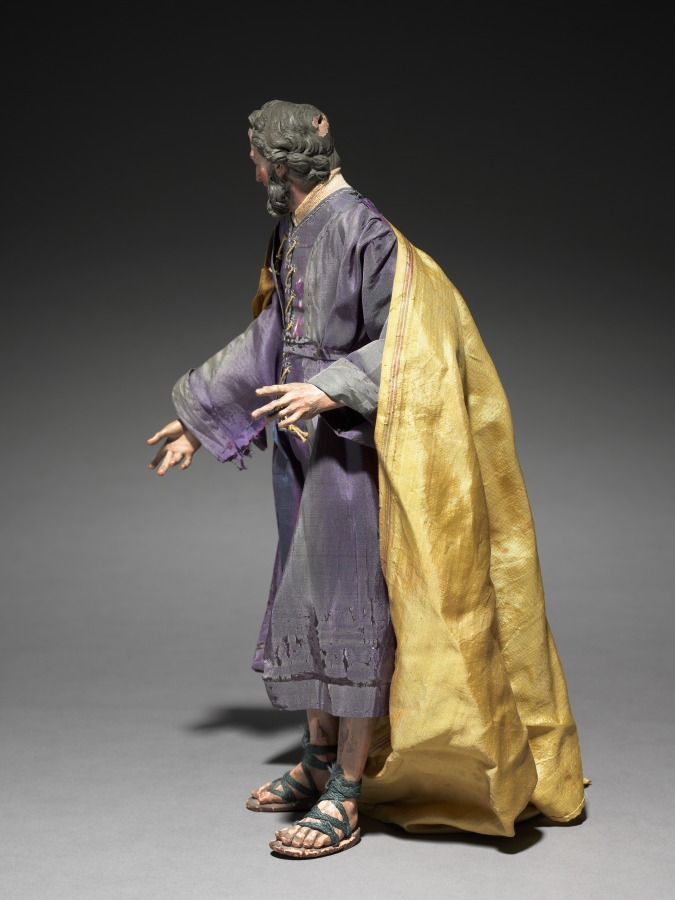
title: Figure from a Crèche: Joseph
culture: Italy, Naples, late 18th-early 19th century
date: 1780–1830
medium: painted wood and terracotta with various textiles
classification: Sculpture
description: The practice of creating scenes of the Nativity for the home dates from the early 1700s in Italy, where people began to set up doll-like figures of about a foot or less in height. The custom was particularly popular in Naples around 1800, where crèche scenes (crèche means cradle, or crib) included many figures, whose heads and hands of painted terracotta, stuffed cloth bodies, and clothing adapted from contemporary local costumes gave them an amazingly realistic character. Representations of the birth of Jesus can be traced to the first few centuries of Christianity. Both living creatures and sculptural depictions of them were used from early times. By the late middle ages it was customary to create life-size figures of wood or stone, naturalistically painted, to represent the characters who participated in the events of Jesus's early life. These sculptures were then arranged in scenes illustrating one or both of the most important of these events, the Adoration of the Shepherds and the Adoration of the Magi-the three kings from the East who came to pay homage to the Christ child. Used in churches, these large figures were especially popular in Italy, Central Europe, Spain, and Portugal.